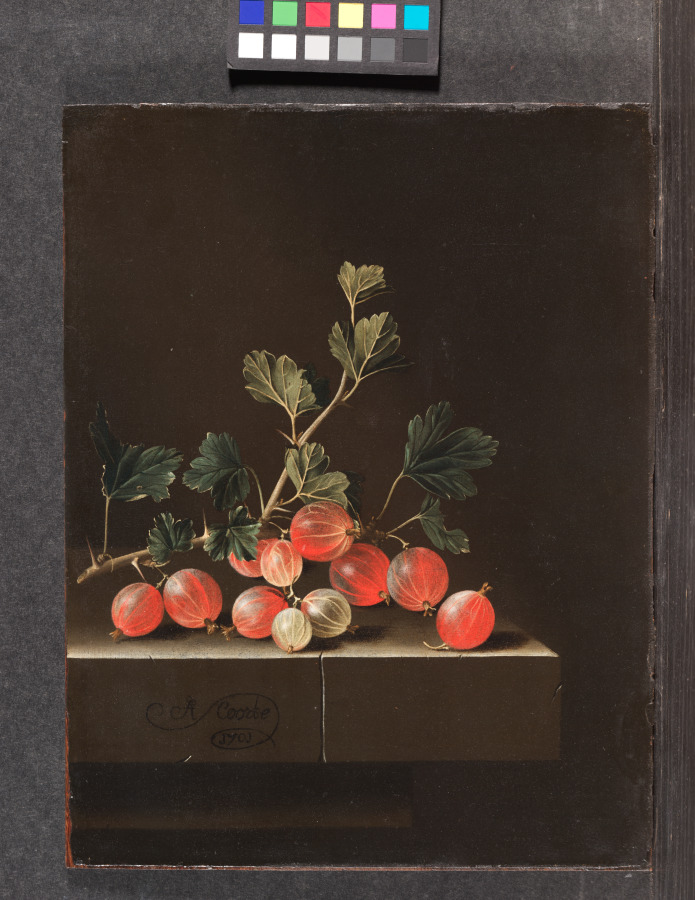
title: Gooseberries on a Table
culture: Netherlands, early 18th Century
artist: Adriaen Coorte (Dutch, 1660–1707)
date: 1701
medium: oil on paper mounted on wood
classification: Painting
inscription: Signed lower left: "A Coorte / 1701"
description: Coorte worked in Middelburg, a wealthy maritime city in the southern part of the Netherlands that fostered a poetic, scientific, and spiritual examination of the natural world. Gooseberries—a modest, local pleasure—could be picked in the wild, although Dutch gardeners in the 1600s were the first to cultivate them to improve their taste. The strong illumination gives the plant a stark grandeur, despite the small scale, and the dark background emphasizes the fruit's delicate translucency. The dessicated flower petals and waxy leaves contrast with the succulent gooseberries, with their skin on the verge of bursting.